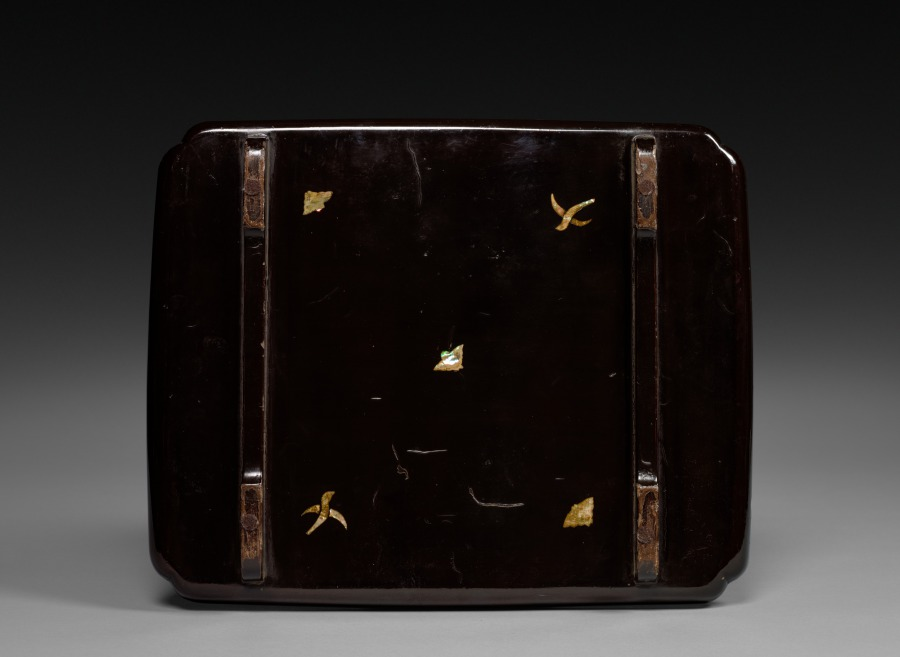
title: Serving Tray: Negoro Ware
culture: Japan, Kamakura period (1185–1333)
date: early 1300s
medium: lacquered wood with inlaid mother-of-pearl designs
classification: Lacquer